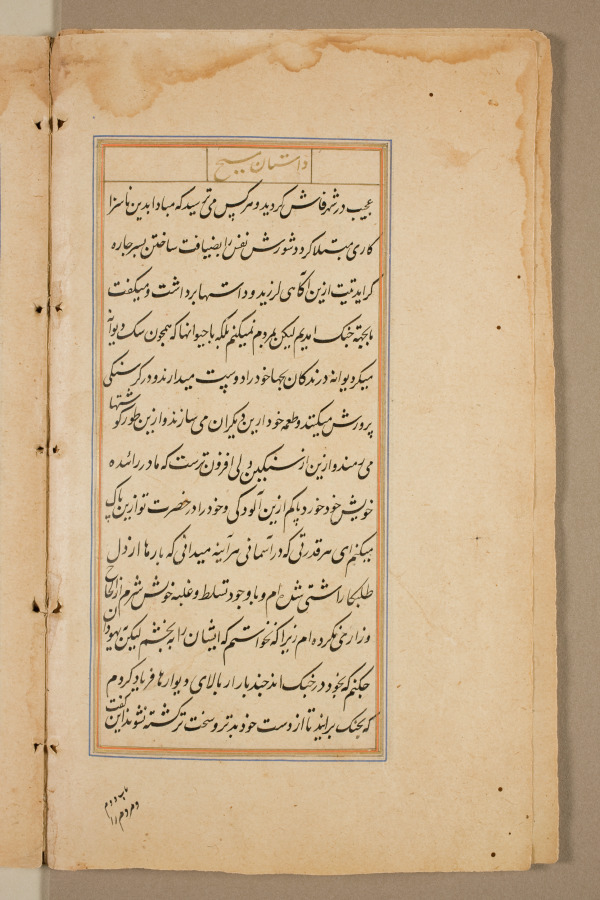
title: Text page from a Mirror of Holiness (Mir’at al-quds) of Father Jerome Xavier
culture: Mughal India, Allahabad, made for Prince Salim (1569–1627)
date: 1602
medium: Ink and gold on paper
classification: Manuscript